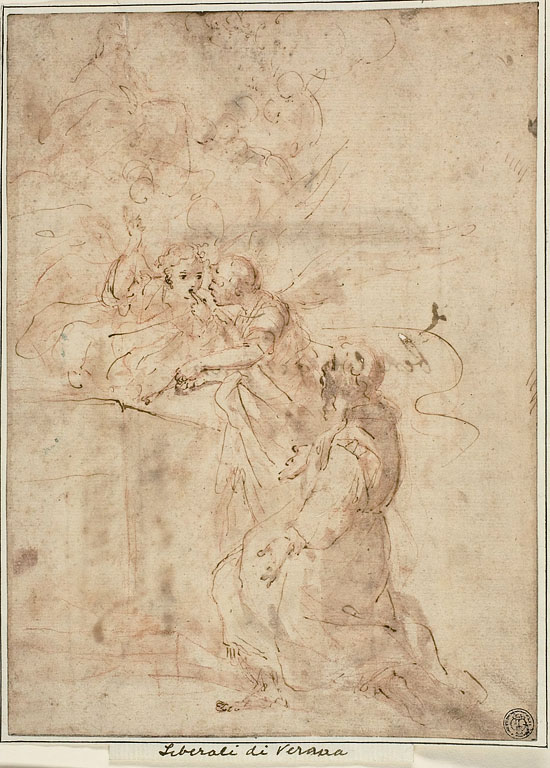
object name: Drawing and Watercolor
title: Vision of Saint Francis of Assisi at the Portiuncula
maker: Giovanni Andrea Donducci, called Mastelletta; Italian, 1575-1655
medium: Pen and brown ink, with brush and pale brown wash, over red chalk and red chalk wash, on tan laid paper, laid down on off-white laid paper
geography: Italy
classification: pen and ink drawings; drawings (visual works); prints and drawing